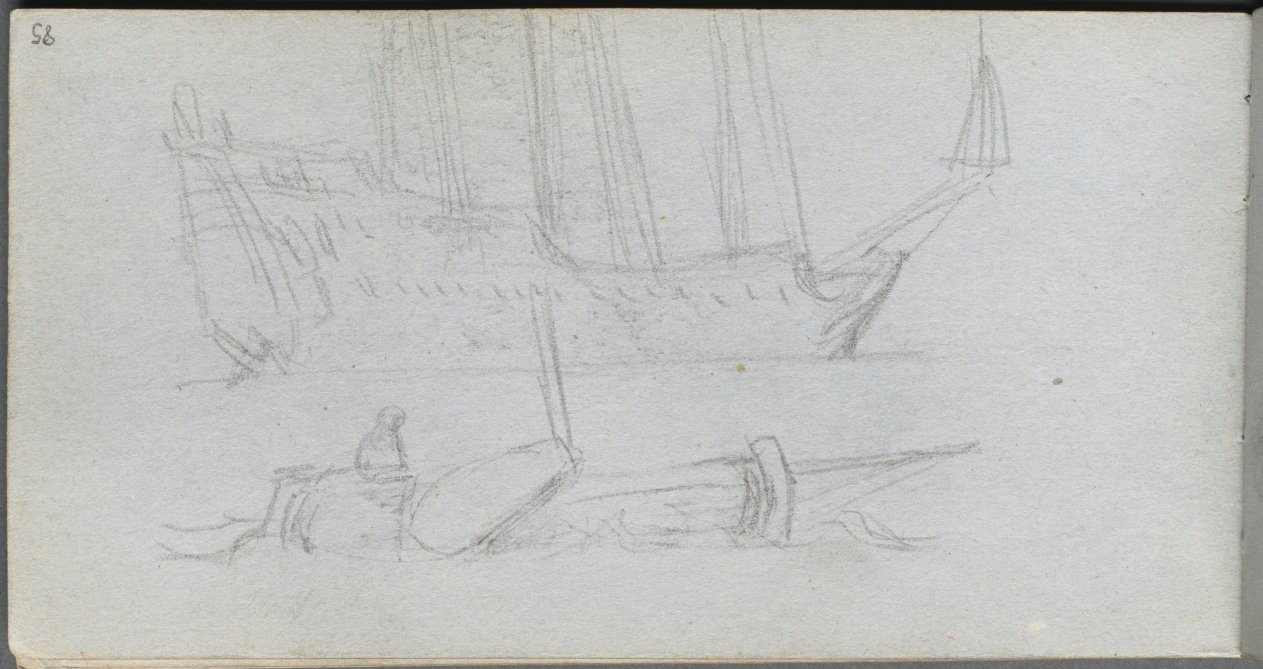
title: Sketchbook, page 85: Study of a Ship and Buoy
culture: France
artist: Ernest Meissonier (French, 1815–1891)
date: c. 1860s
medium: graphite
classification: Bound Volume